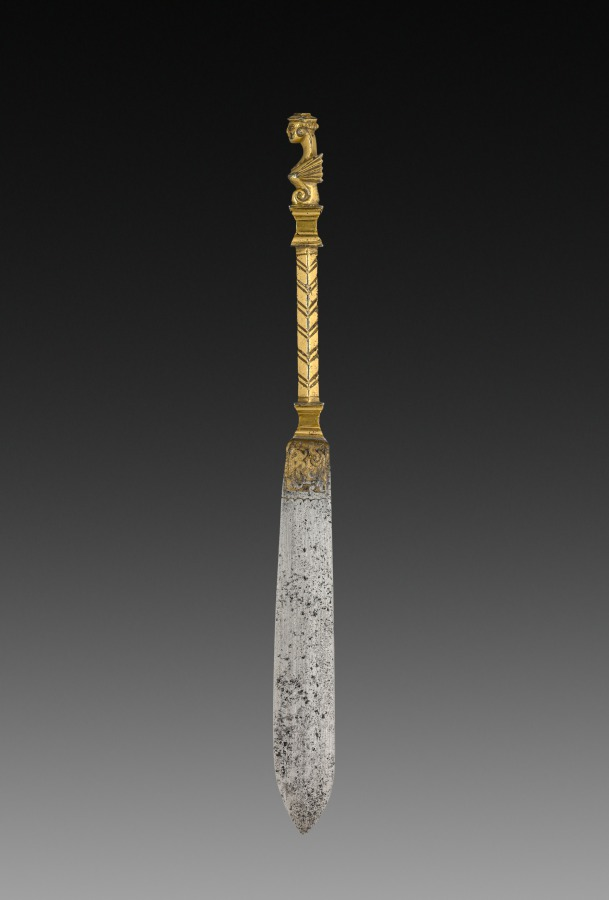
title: Table Knife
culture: Flanders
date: c. 1500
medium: gilt bronze and steel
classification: Metalwork